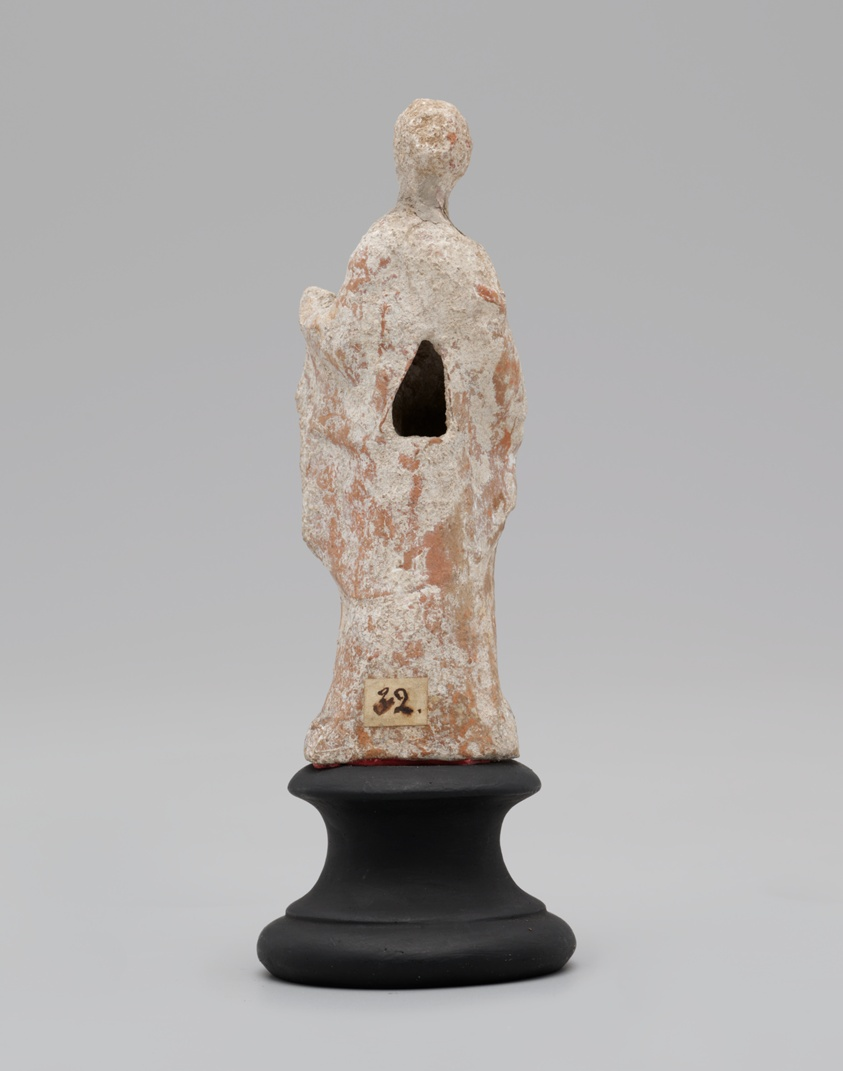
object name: Sculpture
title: Figurine of a Standing woman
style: greek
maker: Greek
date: 4th-3rd century BCE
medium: terracotta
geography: Greece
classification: earthenware; ceramics; sculpture; ancient art